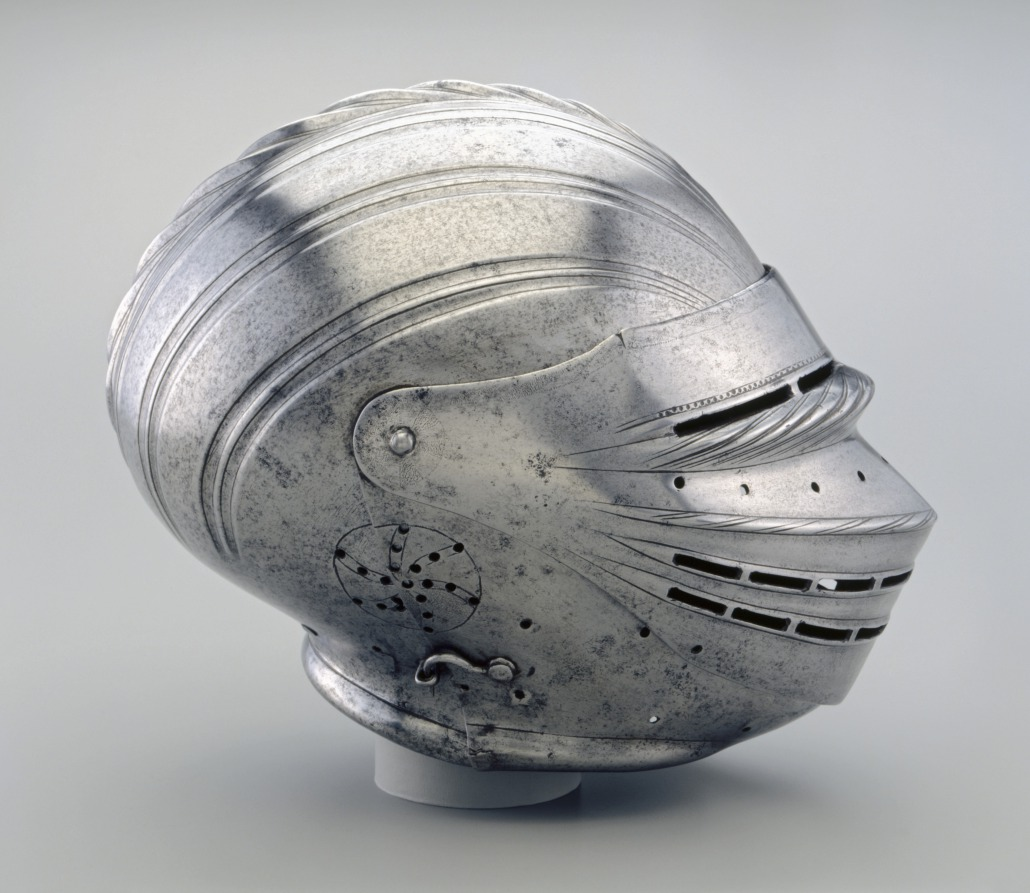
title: Field Armor in Maximilian Style: Helmet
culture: Germany, Augsburg(?), early 16th century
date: c. 1510–15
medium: fluted steel with leather straps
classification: Arms and Armor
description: Most of the elements of this armor were made together, forming a single suit. The lower legs contain some modern restorations. The helmet is believed to be the work of the esteemed Augsburg armorer, Lorenz Helmschmied, who was active at the Hapsburg, Mantua, and Urbino courts between 1467 and his death in 1515.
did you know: This armor was made to mimic the trend of pleated clothing that was popular at the time.